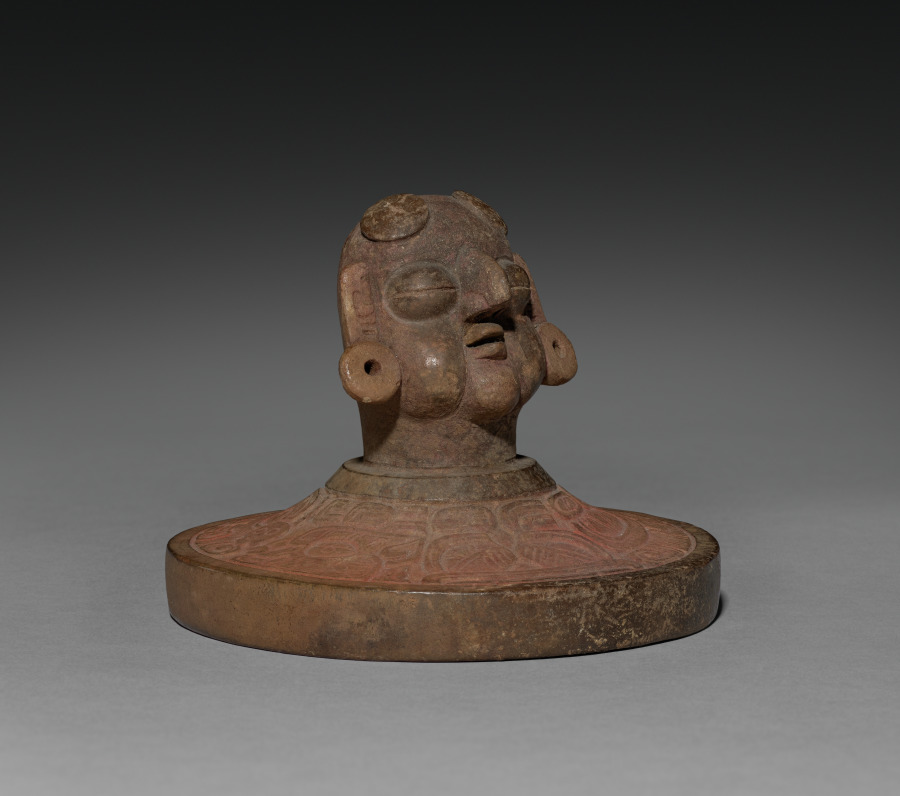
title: Tripod Vessel with Lid (lid)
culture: Mexico or Central America, Maya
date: 250–600 CE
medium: earthenware with pigment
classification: Ceramic